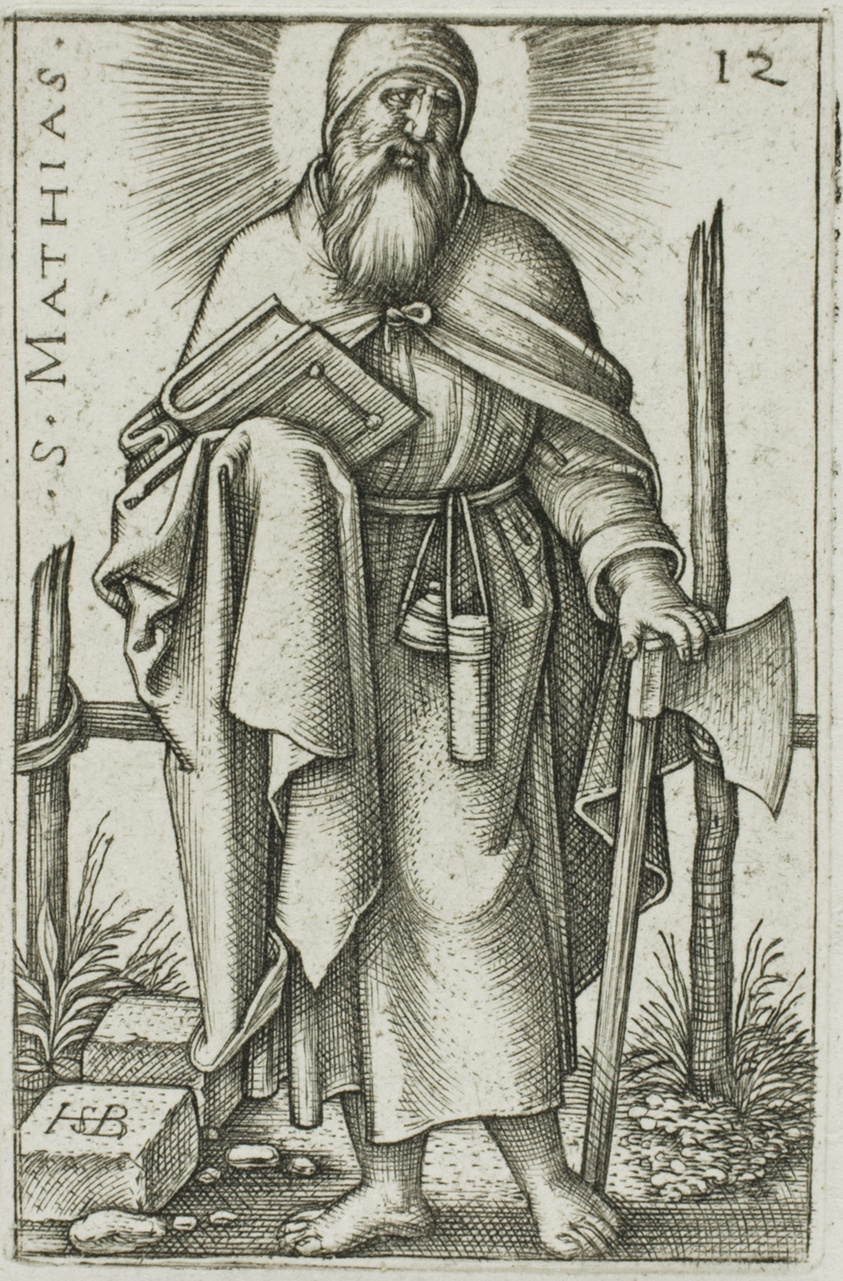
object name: Print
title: St. Matthias, plate 12 from The Twelve Apostles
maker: Sebald Beham; German, 1500-1550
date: 1545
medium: Engraving in black on white wove paper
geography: Germany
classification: engraving; print; prints and drawing